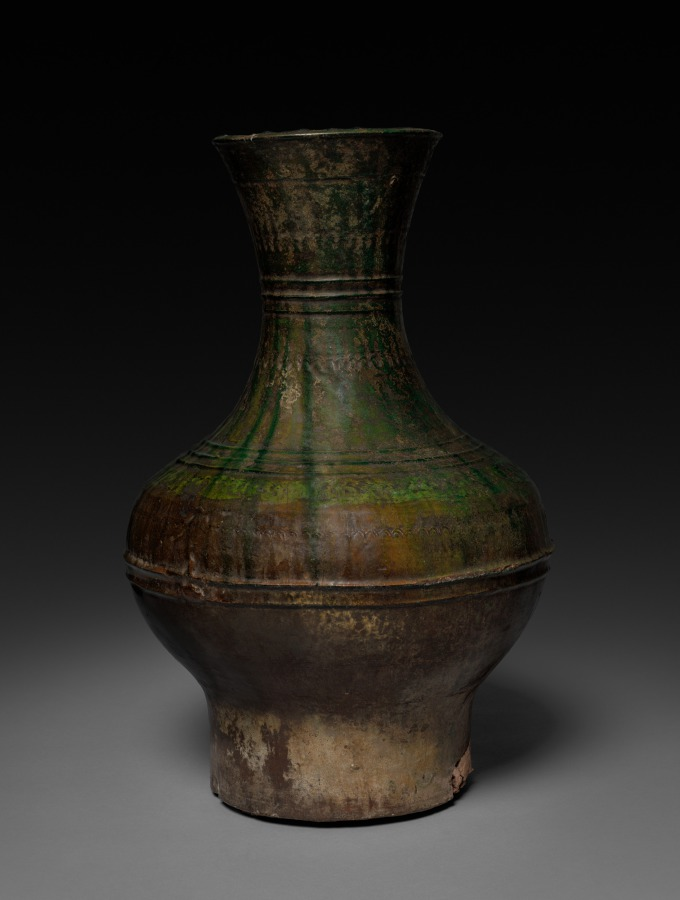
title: Jar (Hu)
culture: China, Han dynasty (202 BCE–220 CE)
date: 206 BCE–220 CE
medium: earthenware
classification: Ceramic